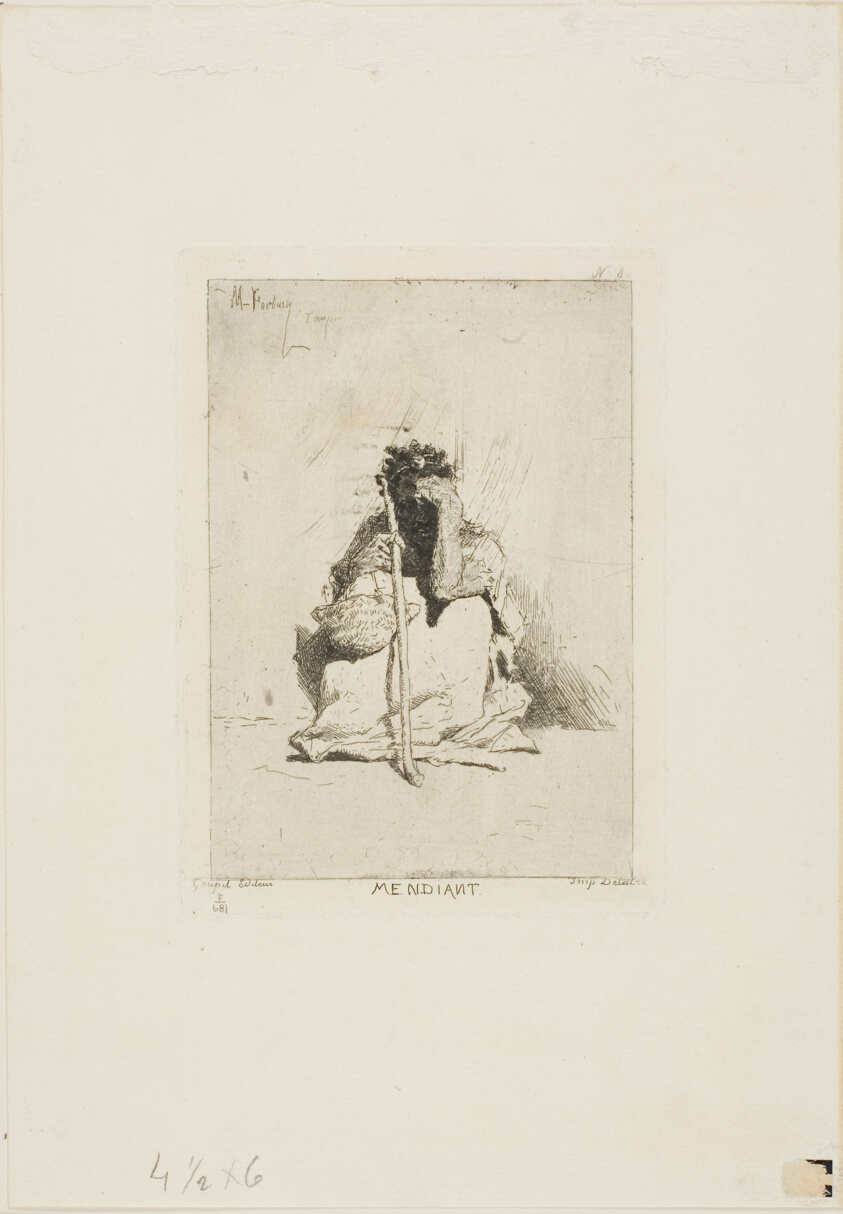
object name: Print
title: A Beggar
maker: Mariano José María Bernardo Fortuny y Carbó; Spanish, 1838-1874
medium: Etching on paper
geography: Spain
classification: etching; print; prints and drawing